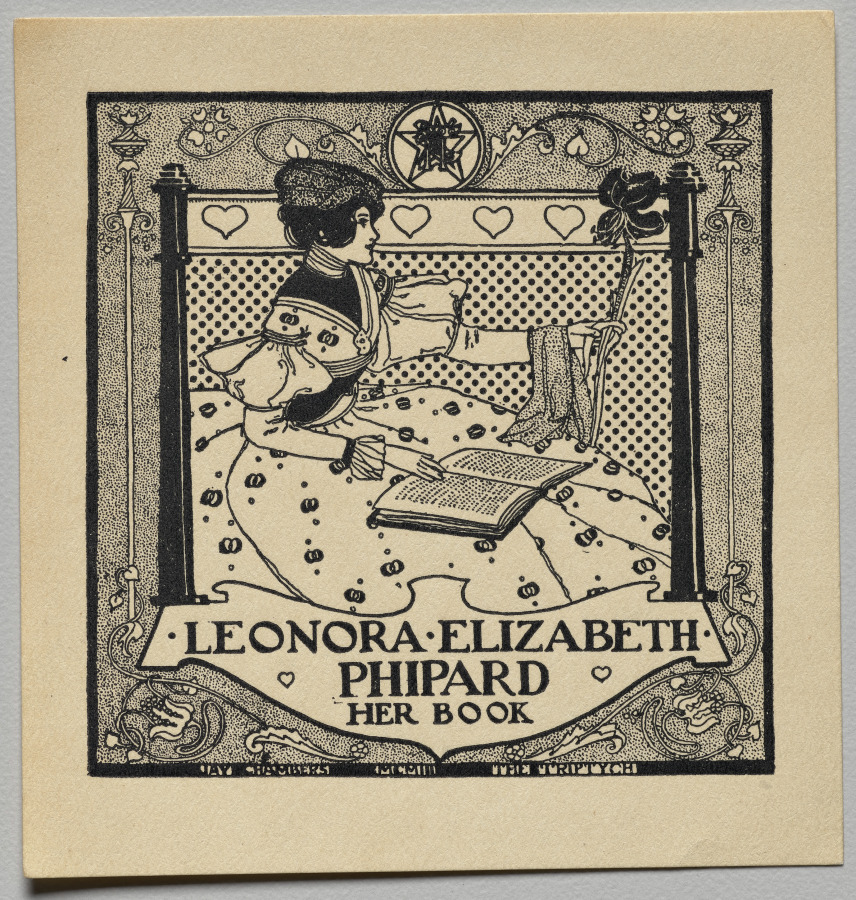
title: Bookplate: Leonora Elizabeth Phipard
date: 1903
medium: print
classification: Print